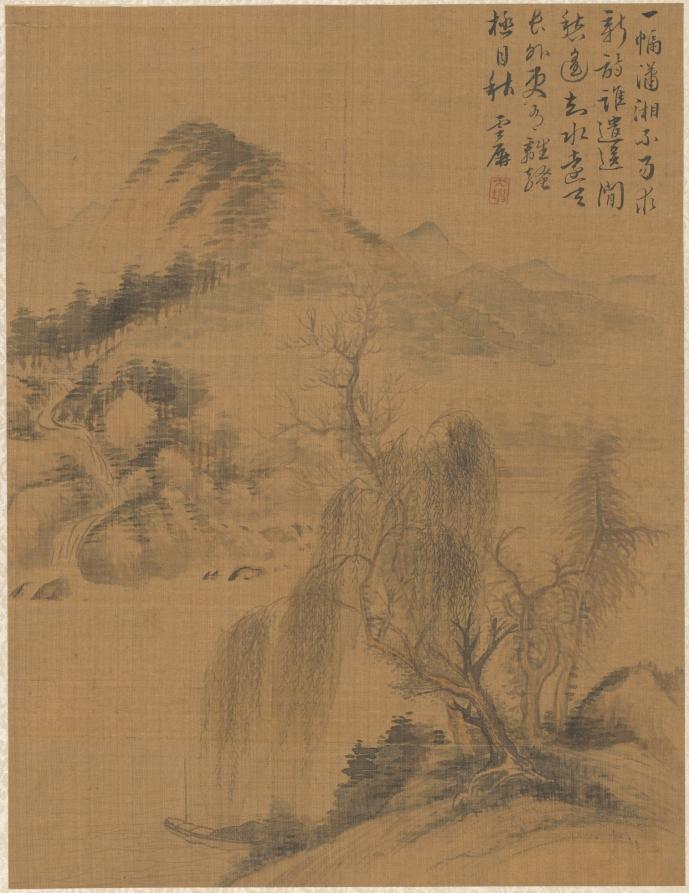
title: Landscape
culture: China, Qing dynasty (1644-1911)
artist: Zhai Dakun (Chinese, d. 1804)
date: 1775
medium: album leaf; ink and color on silk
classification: Painting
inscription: Willow and Waterfall. Traveling on distant waters, beyond the vast sky, There is still ______, autumn as far as the eye can see. Yunping. Seal: r/r "Dakun"